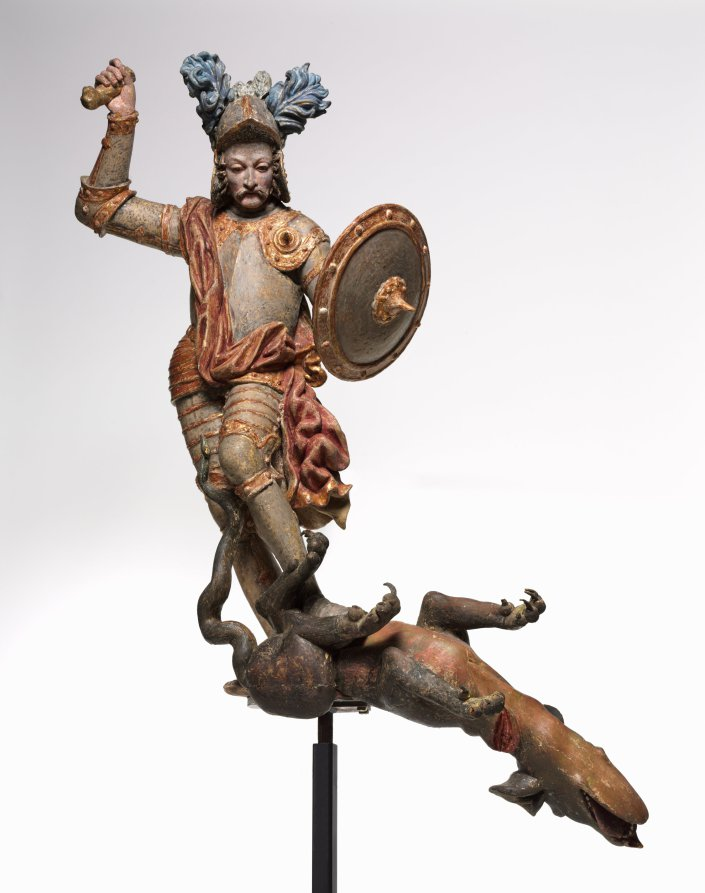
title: Saint George and the Dragon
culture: South Germany or Austria, late 17th century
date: late 1600s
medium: painted and gilded wood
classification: Sculpture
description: Saint George, a Roman soldier martyred for his Christian faith, is best known for slaying a fearsome dragon that terrorized the city of Silene, in Libya. George offered to kill the monster if residents of the city convert to Christianity. Here, George stands triumphantly over the dragon, writhing as it dies. The artist deliberately incorporated features intended to make his figure seem more familiar: the dragon seems more canine than reptilian, while George wears armor from the recent past and bears almost portrait-like facial features.